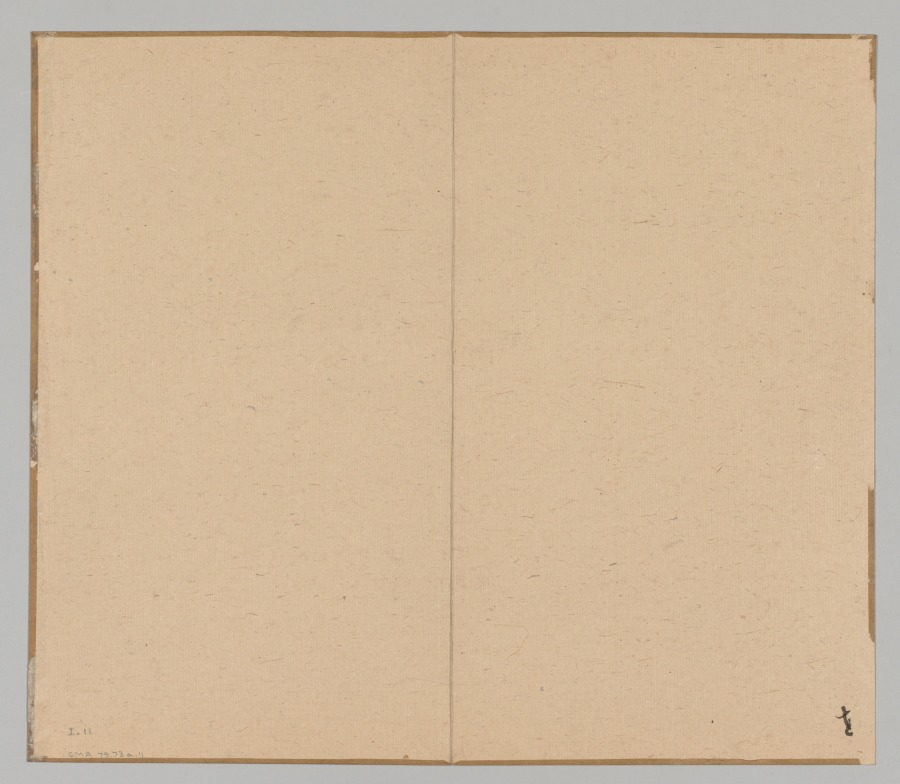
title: Reverberations of Taiga, Volume 1 (leaf 11)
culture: Japan, Edo period (1615–1868)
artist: Aoki Shukuya (Japanese, d. 1802)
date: mid- to late 1700s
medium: double-leaf from a pair of albums; ink and light color on paper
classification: Portfolio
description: Traditionally, young painters in Japan began their studies with an established master-painter. The master's compositions invariably became models that the apprentice copied to learn various ink and brush techniques. Shukuya was a pupil of the famous Kyoto artist Ikeno Taiga, whose style is reflected in these sketches of rocks, trees, and mountains.